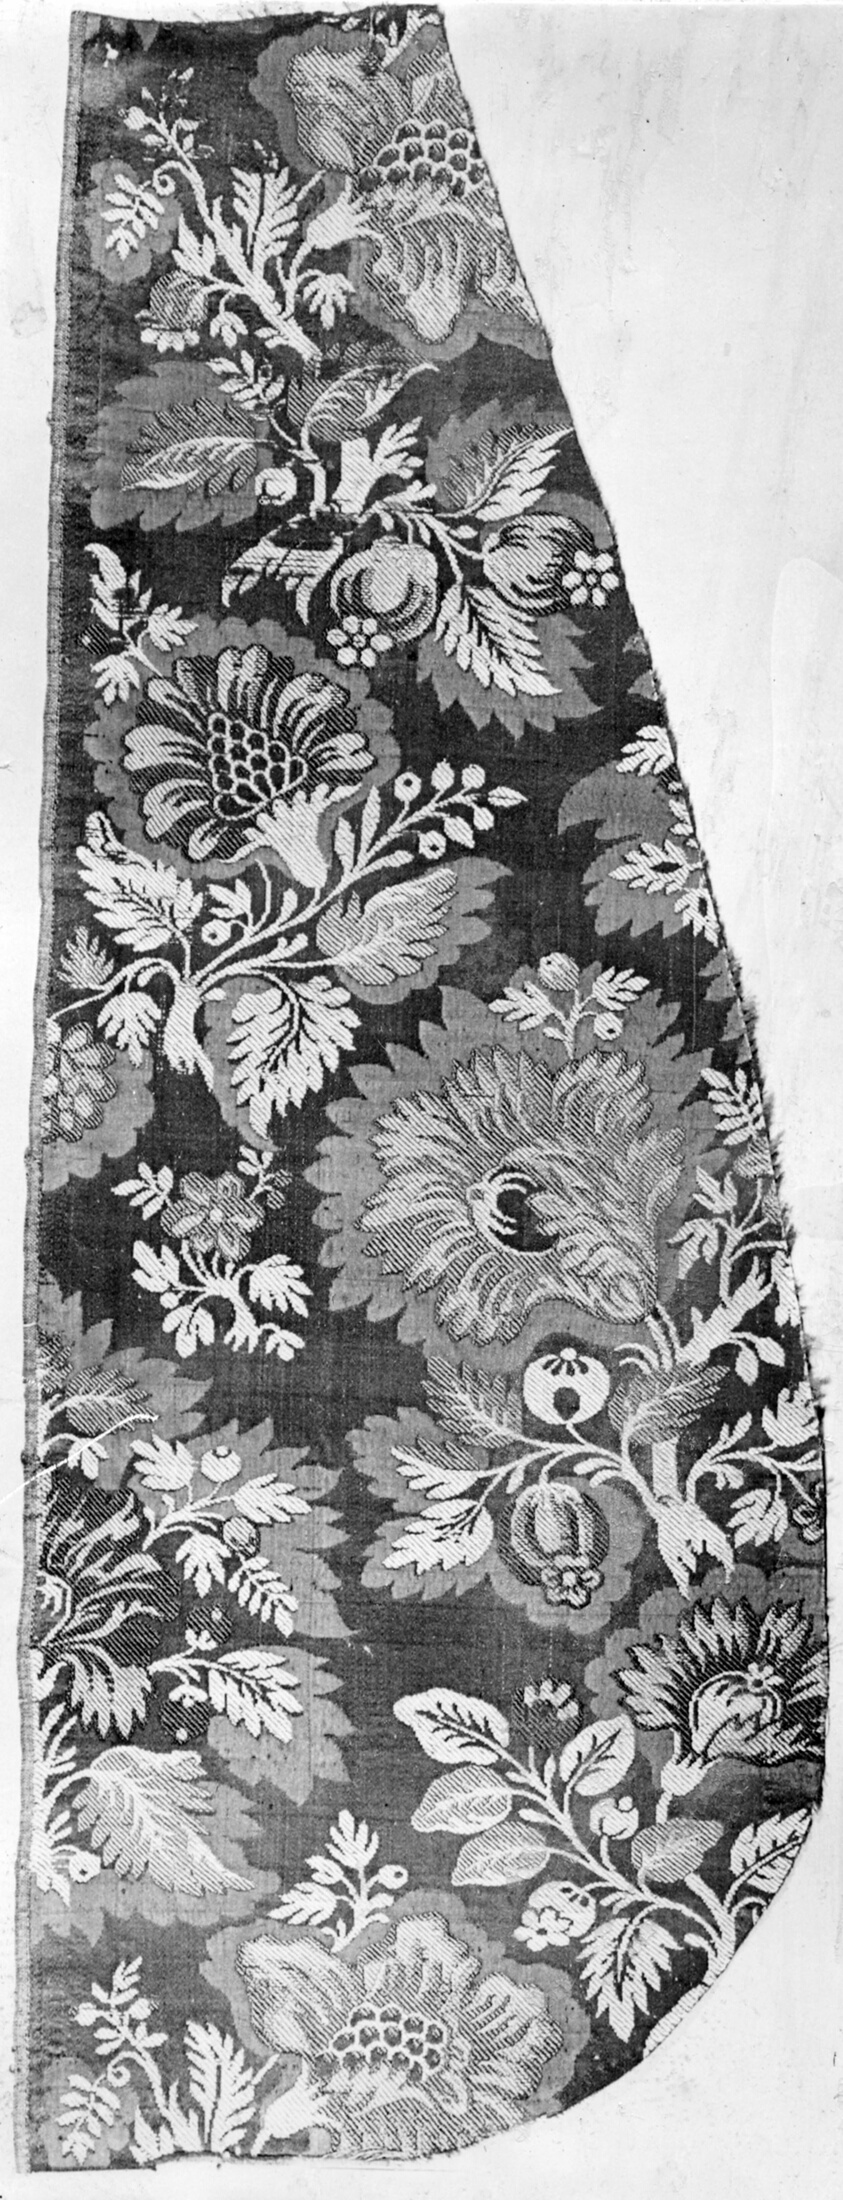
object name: Textile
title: Fragment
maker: France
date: Early 18th century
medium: silk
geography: France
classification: textile; weaving